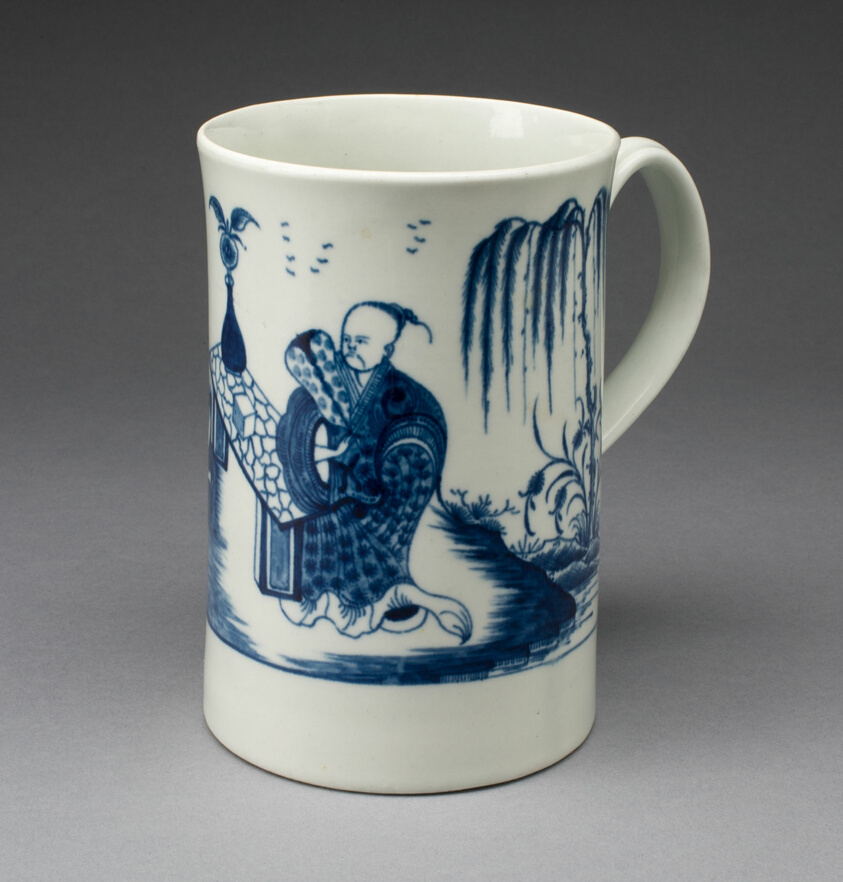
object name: Ceramics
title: Mug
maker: Worcester Porcelain Factory (Warmstry House Period, 1751–1783); Worcester, England, founded 1751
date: 1765/75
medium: Soft-paste porcelain, underglaze blue decoration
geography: Worcester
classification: ceramics; tableware; porcelain; european decorative arts